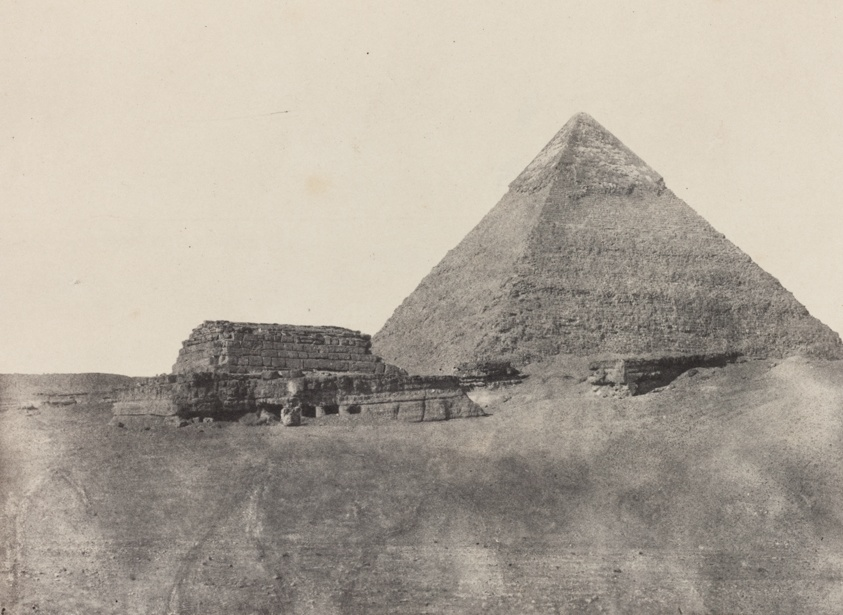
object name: Photograph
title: Pyramide de Chéphren, Egypte Moyenne, plate 10 from the album "Egypte, Nubie, Palestine et Syrie" (1852)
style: 19th century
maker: Maxime Du Camp (French, 1822–1894)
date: 1849/51, printed 1852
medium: Salted paper print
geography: France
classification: salted paper print; photographic process; photography; photograph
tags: Collected by Hugh Edwards, Egypte, Nubie, Palestine et Syrie